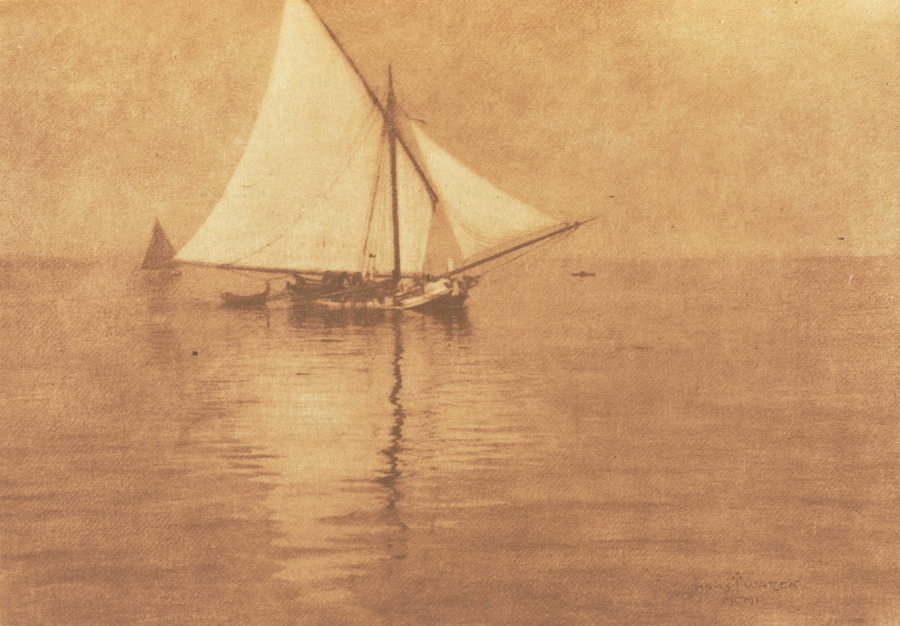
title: Camera Work: The White Sail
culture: Austria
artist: Hans Watzek (Austrian, 1848–1903)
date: 1906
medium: photogravure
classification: Bound Volume